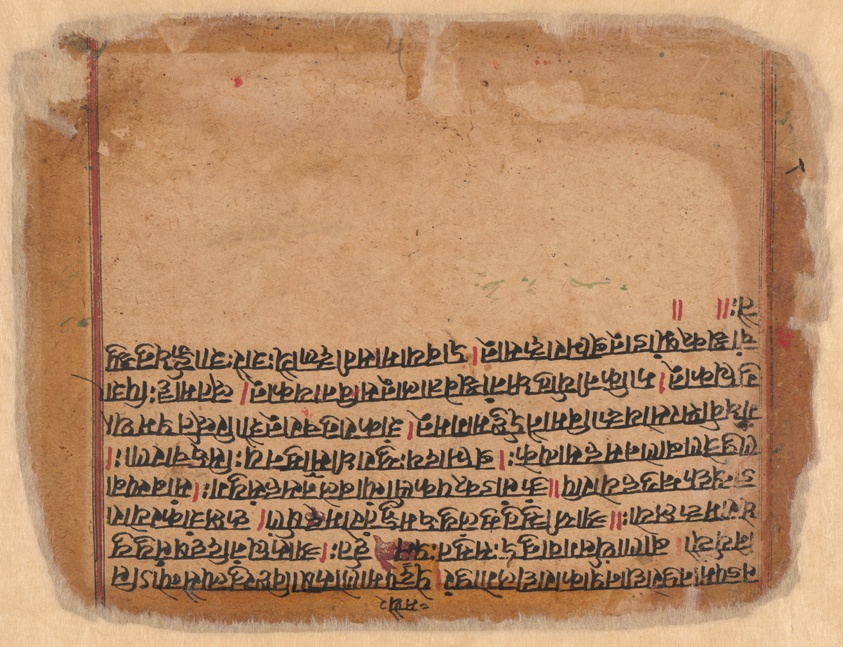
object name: Painting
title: Battle of the Forces of Krishna and Bana, from a copy of the Dispersed Bhagavat Purana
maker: India; Delhi-Agra region, possibly Mathura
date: c. 1520–1530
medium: Opaque watercolor on paper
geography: India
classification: calligraphy; book; asian art; painting